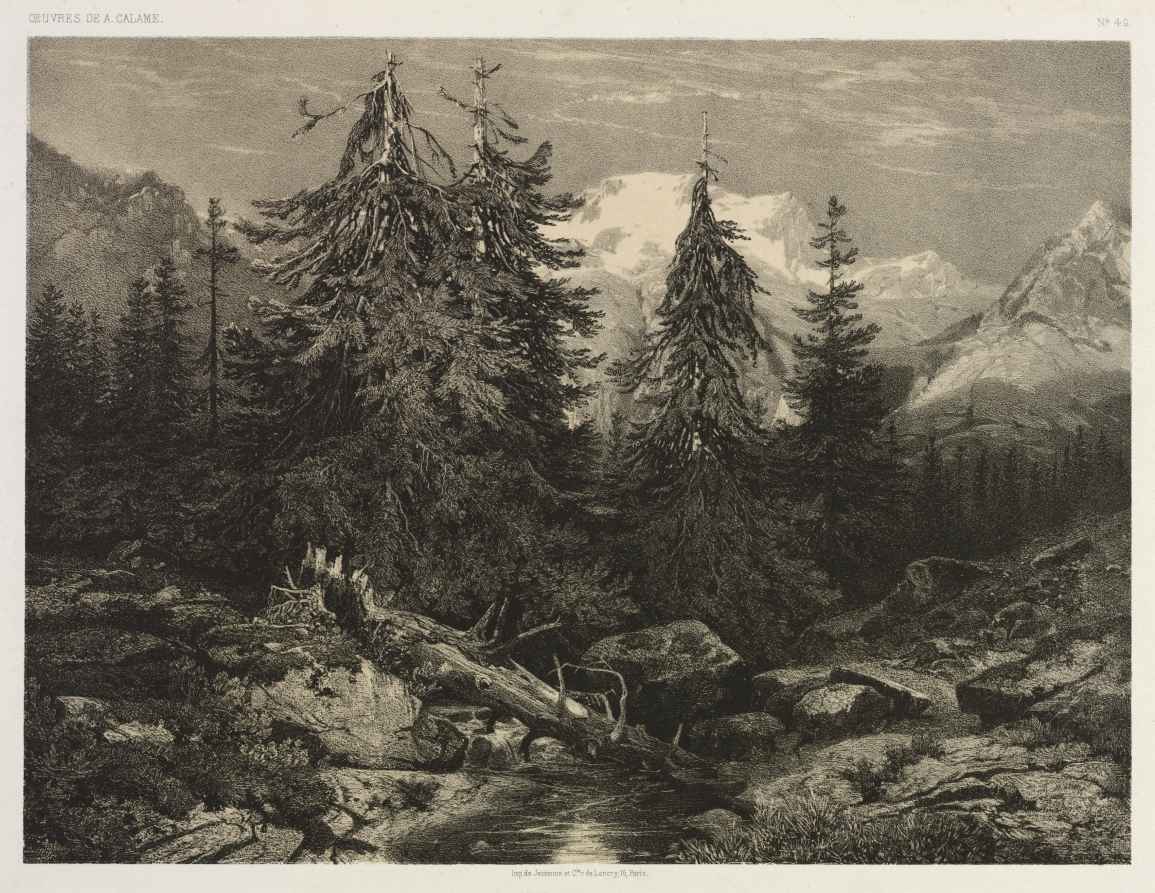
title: Alpine Stream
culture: Switzerland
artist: Alexandre Calame (Swiss, 1810–1864)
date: mid-1800s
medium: lithograph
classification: Print